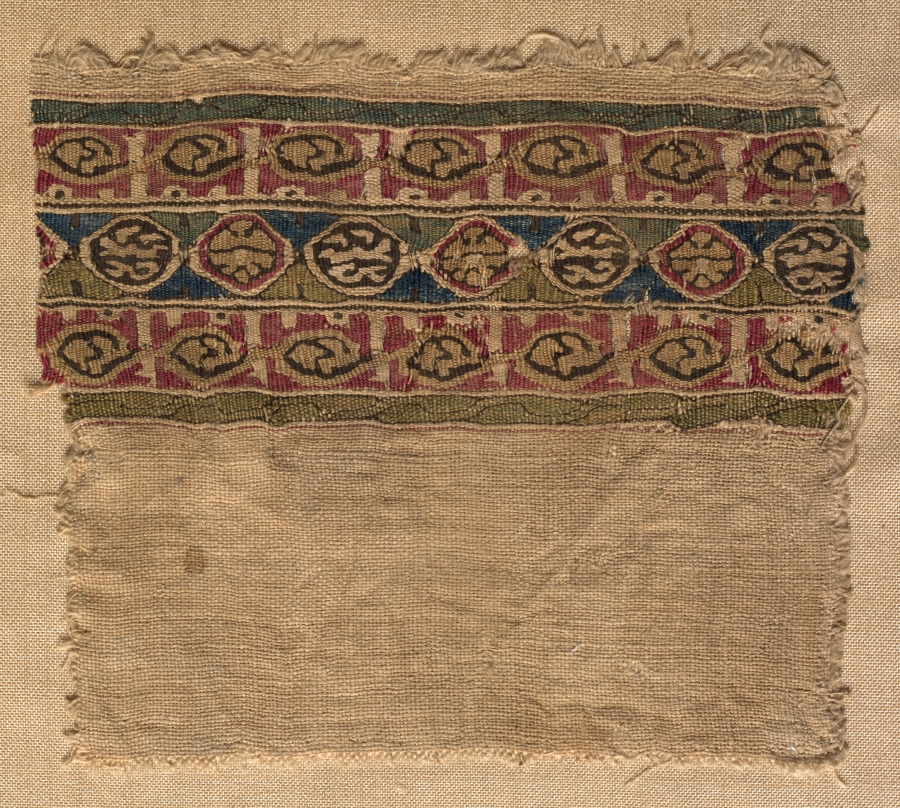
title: Fragment of a Tiraz-Style Textile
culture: Egypt, Fatimid period, Caliphate of al-Mustansir or al-Musta'li, c. AH 475-495, 11th-12th Century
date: 1081 – 1101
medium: tabby ground with inwoven tapestry ornament; linen and silk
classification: Textile